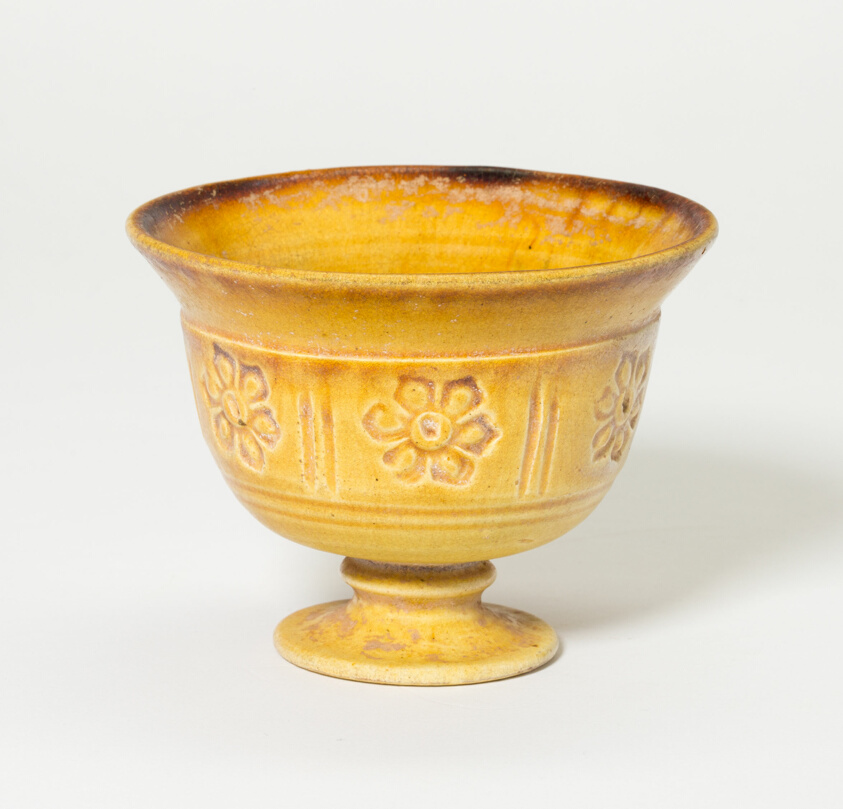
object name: Vessel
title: Stem Cup with Florets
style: Chinese (culture or style)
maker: China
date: Tang dynasty (618–906)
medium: Stoneware with yellow glaze and underglaze mold-impressed decoration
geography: China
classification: drinking vessel; asian art; ceramics; vessel